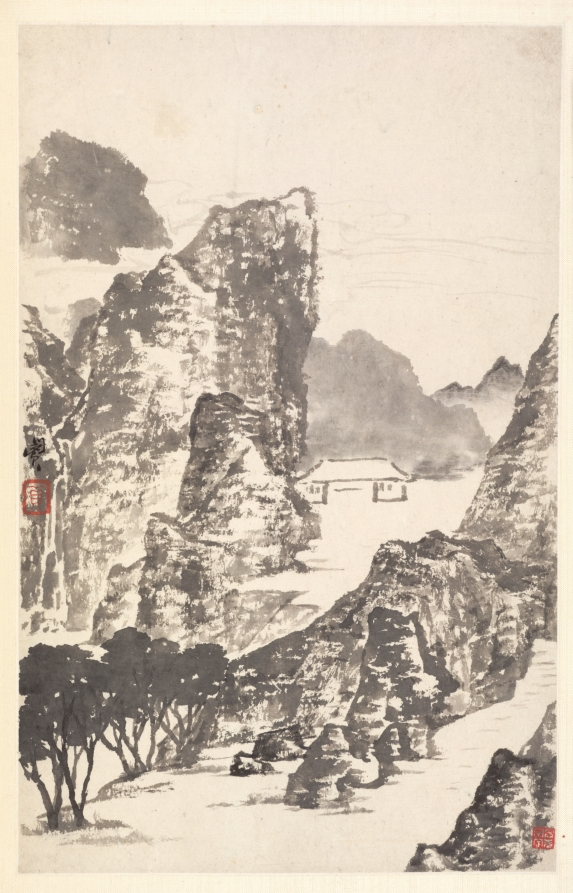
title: Landscape after Mi Fu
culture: China, Qing dynasty (1644-1911)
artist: Min Zhen (Chinese, 1730–after 1788)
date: 1788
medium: album leaf, ink on paper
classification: Painting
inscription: Inscription by Min Chen on the last leaf: I have a habit of collecting strange rocks. My friend Tai-li shan-jen* treasures my paintings as much as I treasure strange rocks. Once we agreed to exchange what we love with each other. However, my busy activities have kept me from carrying this out. This summer I realized that this strange rock has been sitting in my studio for five years, so I painted this to fulfill my old promise. As a record, I chose the grotesque cliff in the last scene of this twelve-leaf album. Cheng-chai, Min Chen inscribed this on the sixth day of the sixth month [July 9] of the wu-shen year [1788]. * Tai-li shan-jen is Wang Li [tzu: Li-fu] tr. Hou-mei Ishida Six seals appearing on the leaves: Min Chen, Cheng-chai, Ching-ch'iao, Chen, Liao-t'ang, Min Chen chih-yin.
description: Min Zhen, who was orphaned at age 12 and developed an eccentric personality, was trained by Tang Yin (1682–1756), a writer, playwright, and superintendent of the imperial porcelain workshops in Jingdezhen. The connection to him may have enabled Min to stay in Beijing for a decade from around 1773. It is not clear whether he ever resided in Yangzhou, but his style is in many instances reminiscent of that of Yangzhou artist Huang Shen. This album demonstrates Min’s versatility and mature style in the last years of his life.